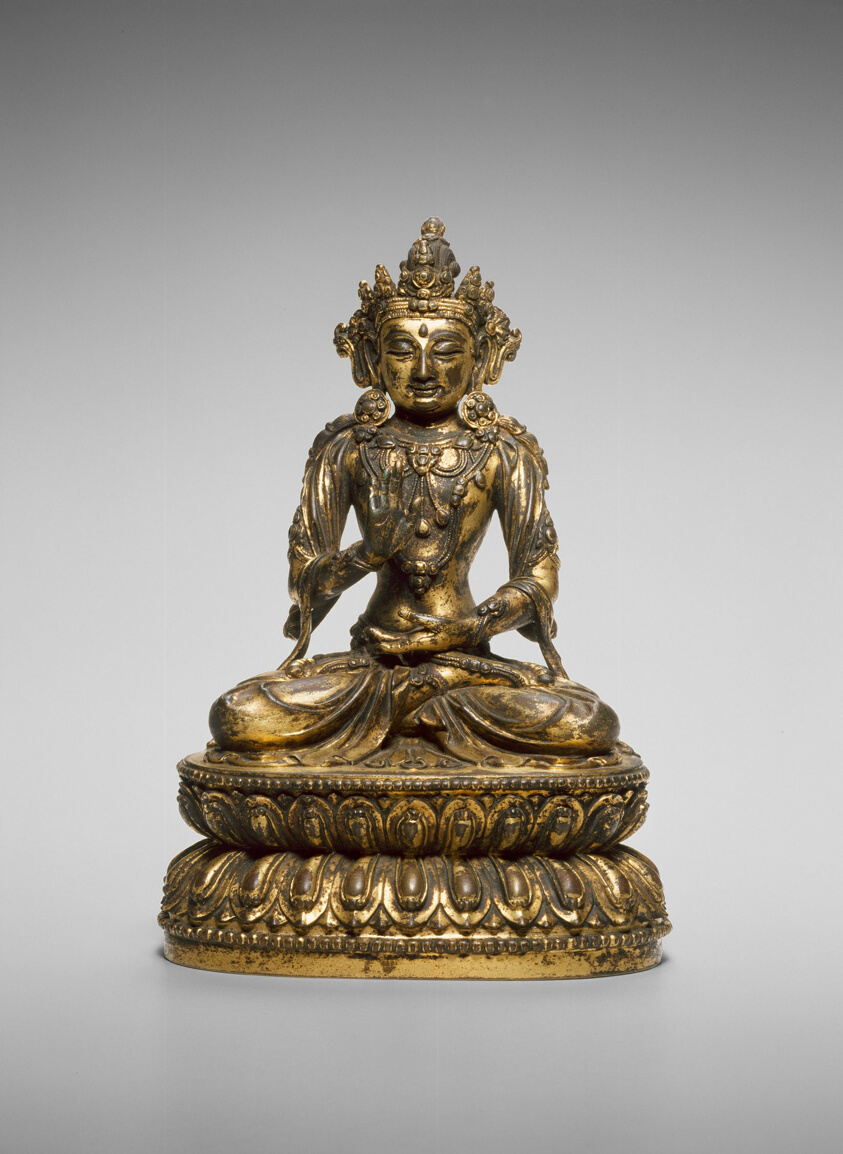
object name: Sculpture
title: One of the Five Celestial Buddhas, Seated with Hands in Gestures of Meditation (Dhyanamudra) and Reassurance (Abhaymudra)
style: Chinese (culture or style)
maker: China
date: Ming dynasty (1368–1644), Yongle period (1403–24)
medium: Gilt copper alloy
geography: China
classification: bronze; metal; sculpture; asian art